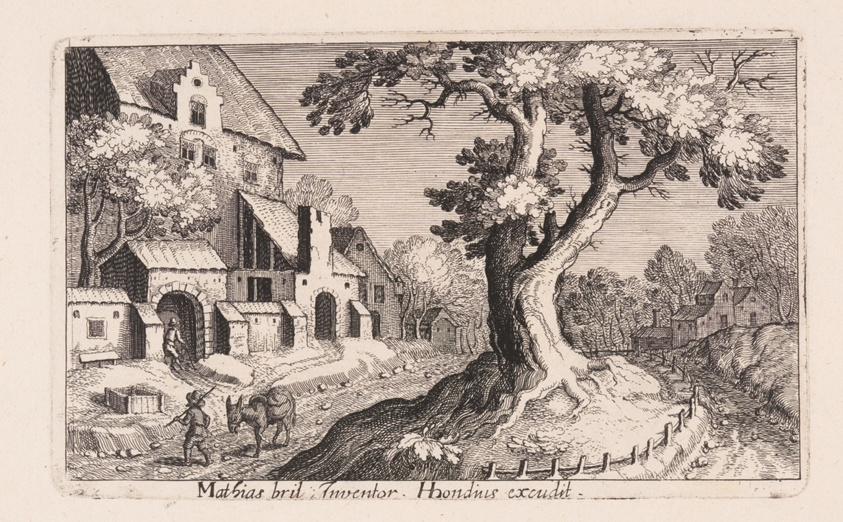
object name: Print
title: Man with a Donkey walking by a Village, from Topographia Variarum Regionum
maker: Simon Frisius (Dutch, c. 1580–1629); after Matthijs Bril (Flemish, 1550-1583)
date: 1614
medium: Etching on paper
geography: Netherlands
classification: etching; paper; print; prints and drawing